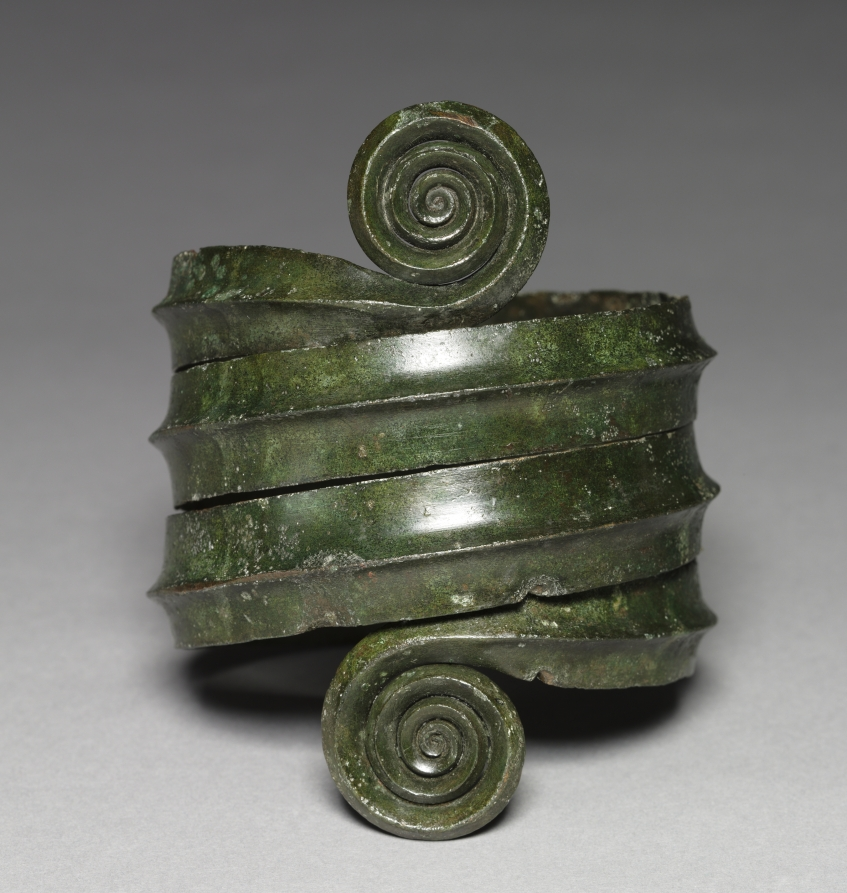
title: Turned Armilla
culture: Hungary, Bronze Age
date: c. 1500 BCE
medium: bronze, wrought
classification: Metalwork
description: Europe. As the spiral mimics forms found in nature - specifically in nautilus shells - it is the basis for logarithmic measures of progression in measurement and growth, which in turn help establish the Fibonacci sequence. Through this sequence we can analyze the phenomenon of spiral designs, specifically in nautilus shells, where the radius of each new chamber grows at a rate determined by a specific proportion to the previous one.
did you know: This armilla or arm ornament has a ridge along the spine, ending in a spiral at both ends.